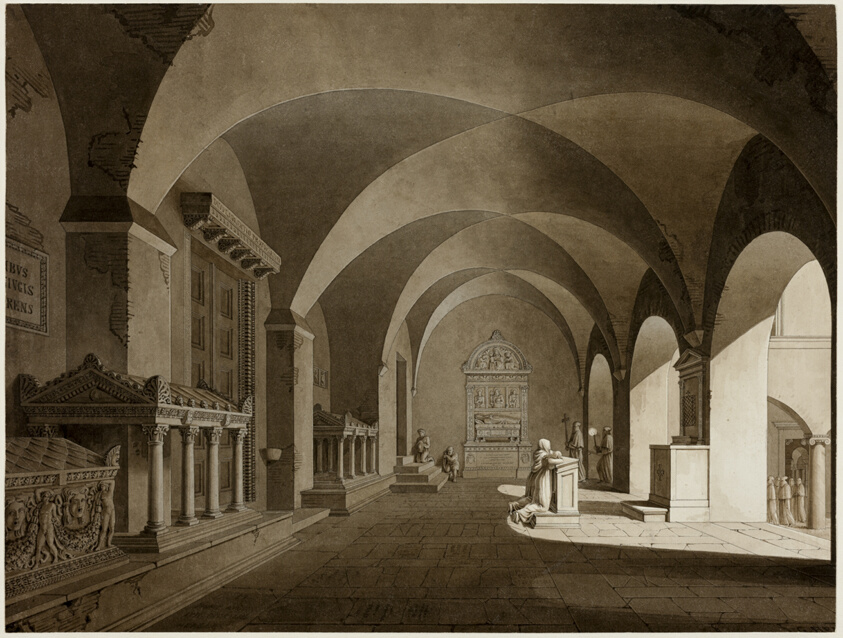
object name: Drawing and Watercolor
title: A View in San Lorenzo Fuori le Mura, Rome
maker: Gustav Friedrich Hetsch (German, 1788-1864)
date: c. 1820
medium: Pen and brown ink and brush and various brown washes on ivory wove paper, edge-mounted to an ivory laid paper inlay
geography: Germany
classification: pen and ink drawings; prints and drawing; paper